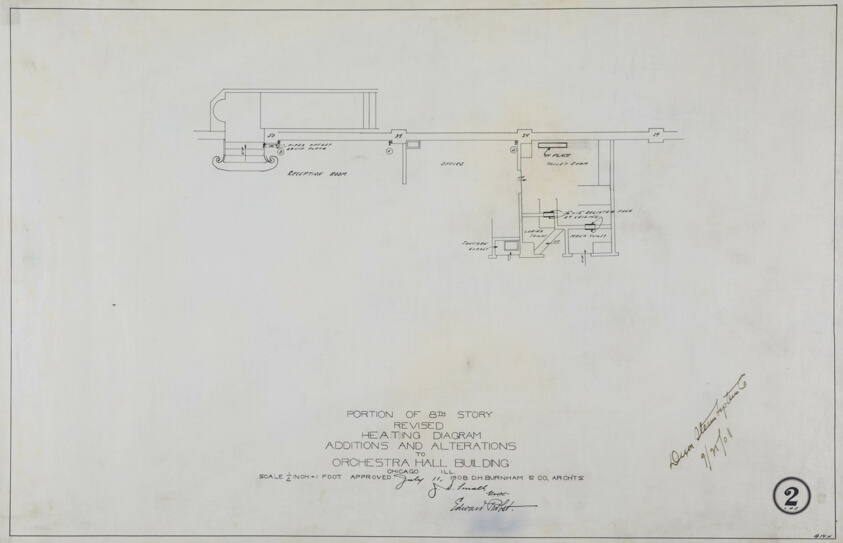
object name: Architectural Drawing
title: Orchestra Hall Heating Revisions, Chicago, Illinois, Diagrams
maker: D.H. Burnham & Company; American, 1896–1912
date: 1908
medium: Ink on linen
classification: architecture; architectural drawing